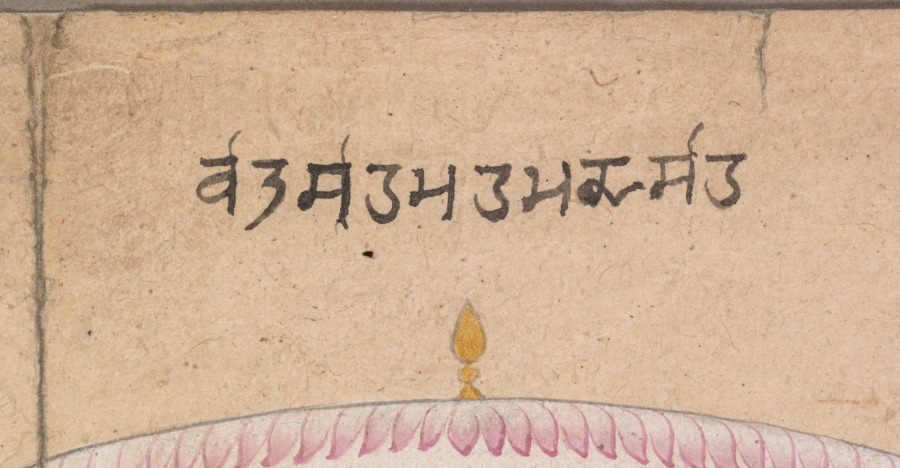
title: Two Elephants Fighting in a Courtyard Before Muhammad Shah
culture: Northern India, Himachal Pradesh, Guler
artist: attributed to Nainsukh (Indian, 1710–1778)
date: c. 1730–40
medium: Gum tempera, ink, and gold on paper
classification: Painting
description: The Mughal emperor responsible for a revival of courtly arts and pastimes was Muhammad Shah (reigned 1719–48). This painting was made by an artist from a small kingdom in the western Himalayas who stayed at the Mughal court in Delhi and painted scenes of his experiences. Like his predecessors, Muhammad Shah enjoyed watching elephant fights. He is shown in his window of public audience, marked by a golden carpet, smoking a hookah. Women from his harem can be seen looking on from behind painted screens. Two pairs of men hold fire brands and spears to prevent the elephants from running off and to keep them under control. The intensity of the fight—captured at a moment when one mahout, or elephant trainer, has dropped his goad and is about to jump off—is augmented by the dense colors and forms in contrast to the otherwise pale planes, balanced only by the strip of palace windows.